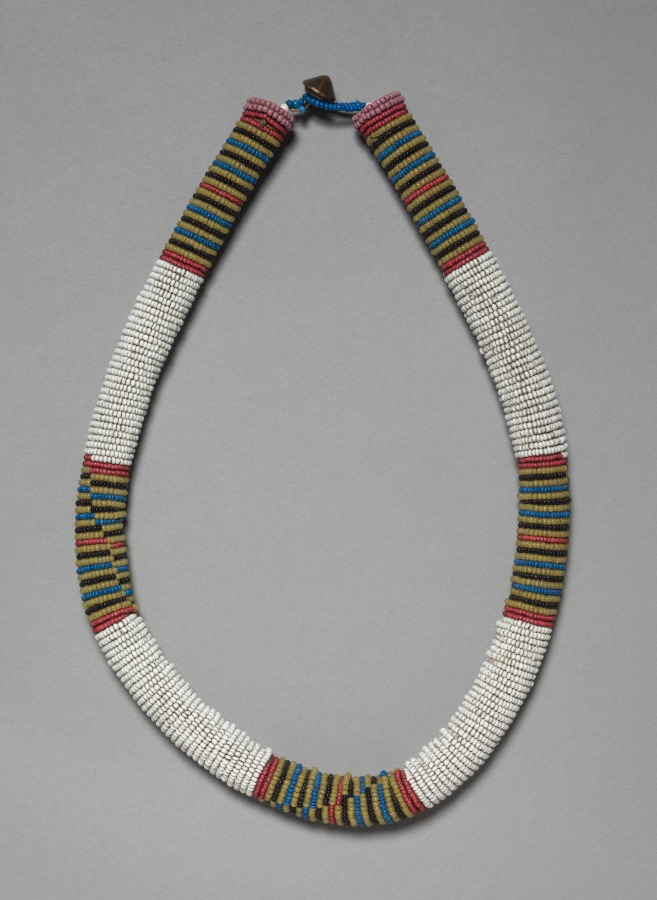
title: Beaded Necklace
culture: Southern Africa, South Africa, Zulu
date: by 1942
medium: Plant fibers, glass beads, possibly sinew, and copper alloy button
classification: Jewelry